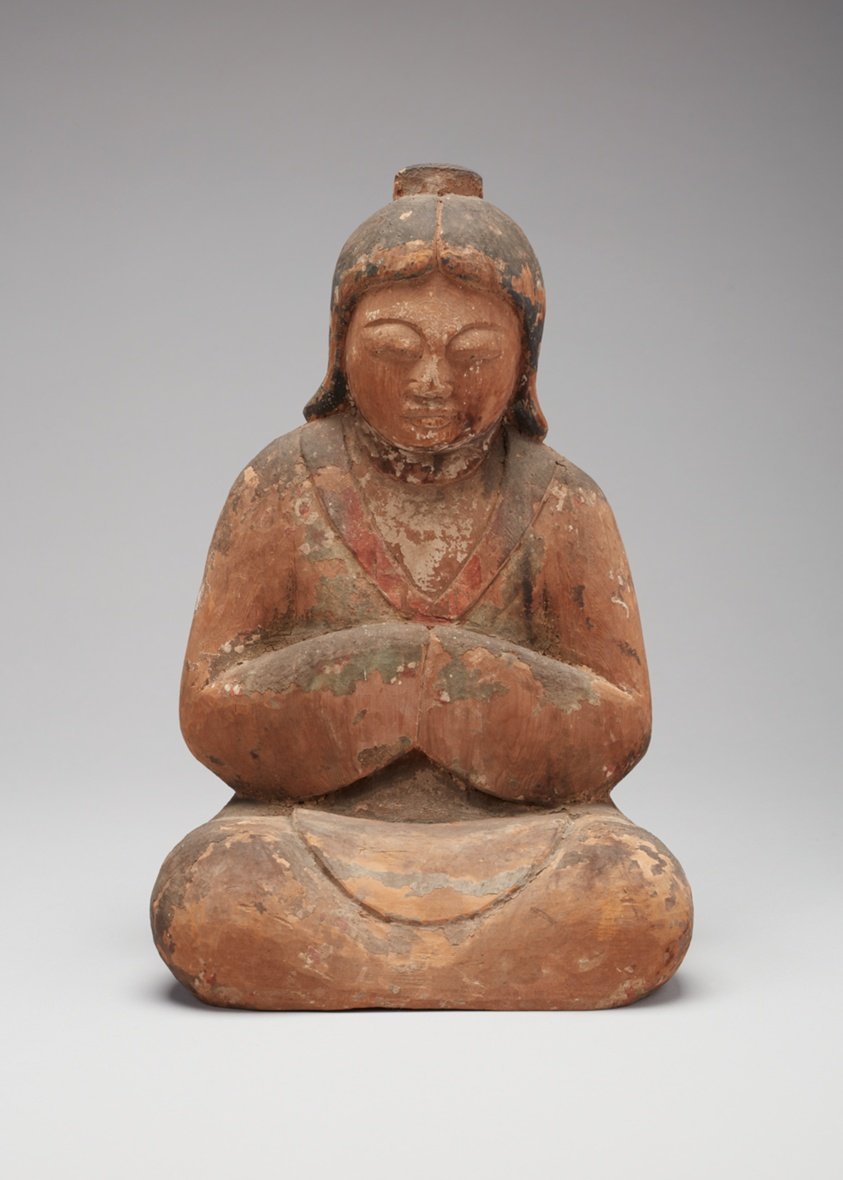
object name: Sculpture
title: Female Shinto Deity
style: Japanese (culture or style)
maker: Japan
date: 12th century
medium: Wood with traces of polychromy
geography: Japan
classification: wood; sculpture